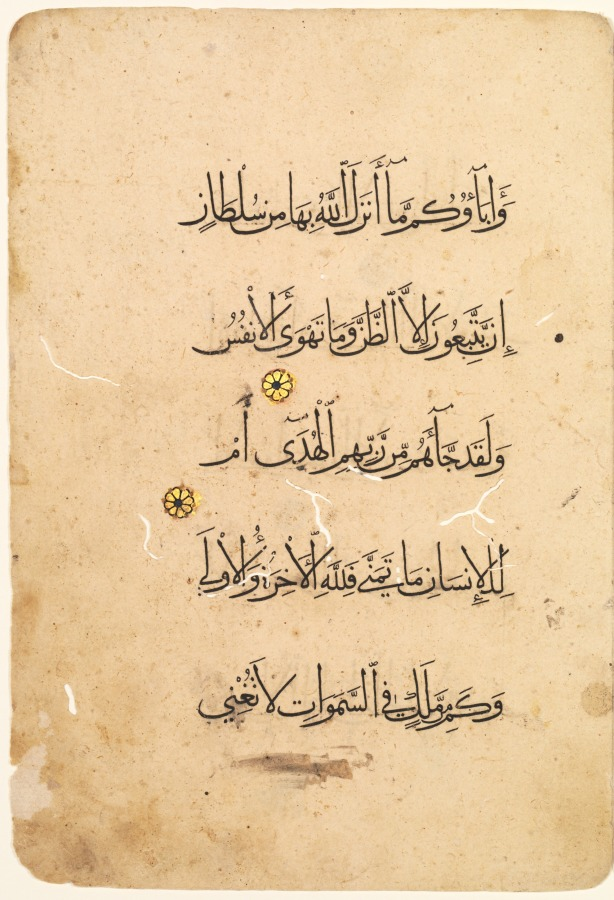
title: Qur'an Manuscript Folio (recto; verso) [Left side of Bifolio]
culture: Egypt, Mamluk sultanate (1250–1517)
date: 1300s–1400s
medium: ink, gold, and colors on paper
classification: Drawing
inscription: Sura-al-Najm [The Stars] 53:part 23-part 26 (Arabic) Script: Muhaqqaq (five lines to a page)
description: It is through the Arabic language that the Qur’an was revealed to the Prophet Muhammad in the 600s. As a result, calligraphy is celebrated as the highest form in Islamic art. The verses (ayat) written here come from the 53rd chapter (surah) of the Qur’an, also known as the Surah An-Najm, the Chapter of the Star. The significance of the Qur’an provides an explanation for the importance of calligraphy, but its use was not restricted to religious texts. Many objects in the museum's Islamic collection bear calligraphic inscriptions and come from secular contexts, displaying the versatility and creativity of this art form.